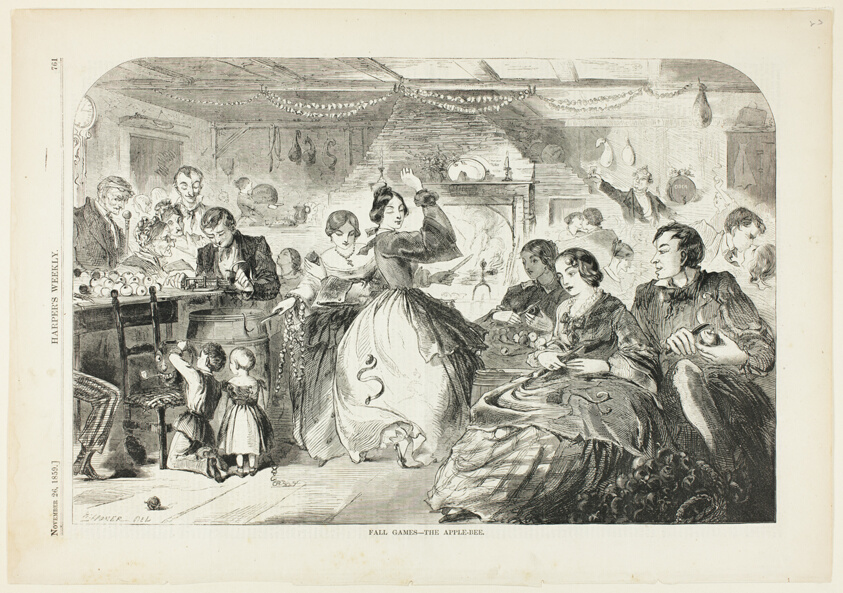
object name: Print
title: The Apple Bee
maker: Winslow Homer (American, 1836-1910)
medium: Wood engraving on paper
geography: United States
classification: wood engraving; print; prints and drawing